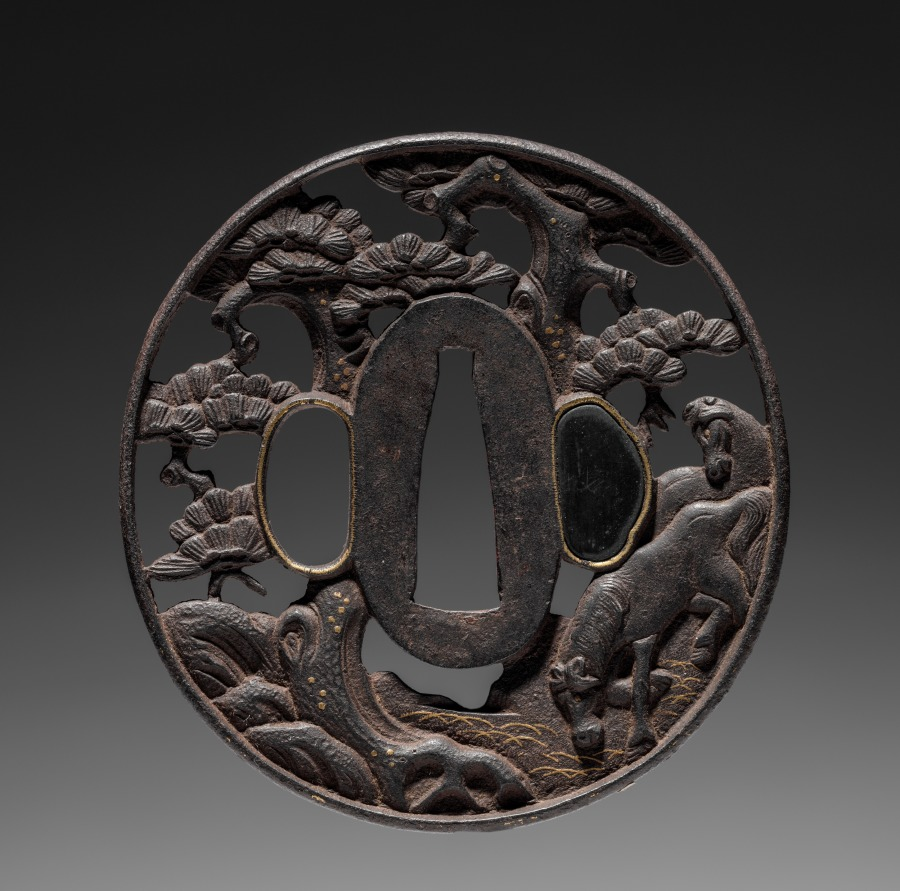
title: Sword Guard (Tsuba) with Horses under Pine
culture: Japan, possibly Edo period (1615-1868)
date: c. 1615–1868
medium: iron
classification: Arms and Armor